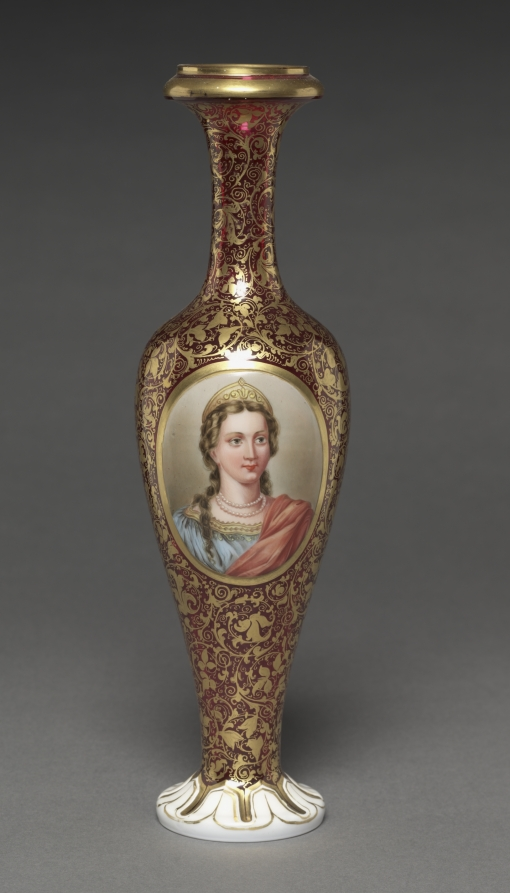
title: Vase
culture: Bohemia (?), 19th century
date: 1840–1860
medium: glass with enamel and gilt decoration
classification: Glass